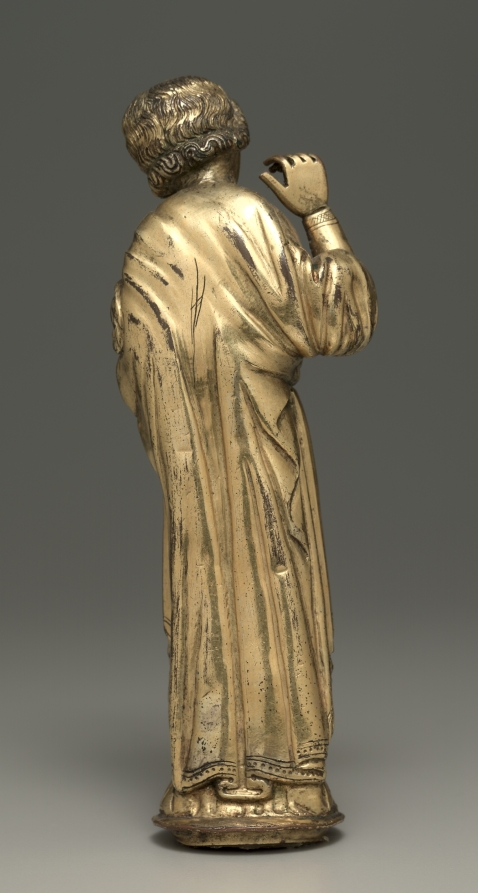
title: Mourning Saint John the Evangelist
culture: Austria, Upper Rhine, 15th century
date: early 1400s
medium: gilt copper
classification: Sculpture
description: These small statuettes would have originally flanked a crucifix as suggested by this arrangement. According to the Gospels, the Virgin and Saint John were present on Golgotha at Christ’s death. Medieval artists frequently depicted them standing next to the cross.